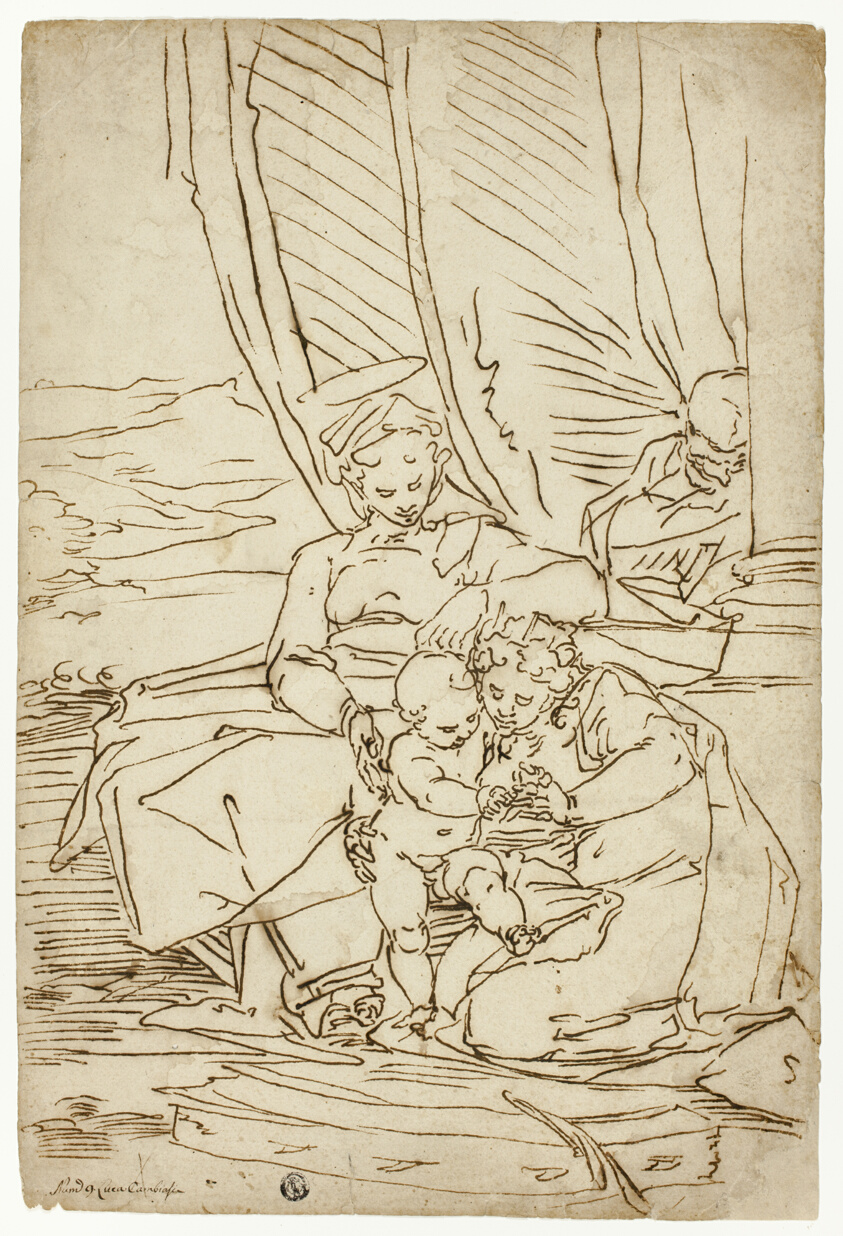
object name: Drawing and Watercolor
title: Holy Family with Saint Catherine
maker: Attributed to Luca Cambiaso; Italian, 1527-1585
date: 1570/90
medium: Pen and brown ink, on ivory laid paper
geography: Italy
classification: pen and ink drawings; drawings (visual works); prints and drawing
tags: Century of Progress, world's fairs, Chicago World's Fairs